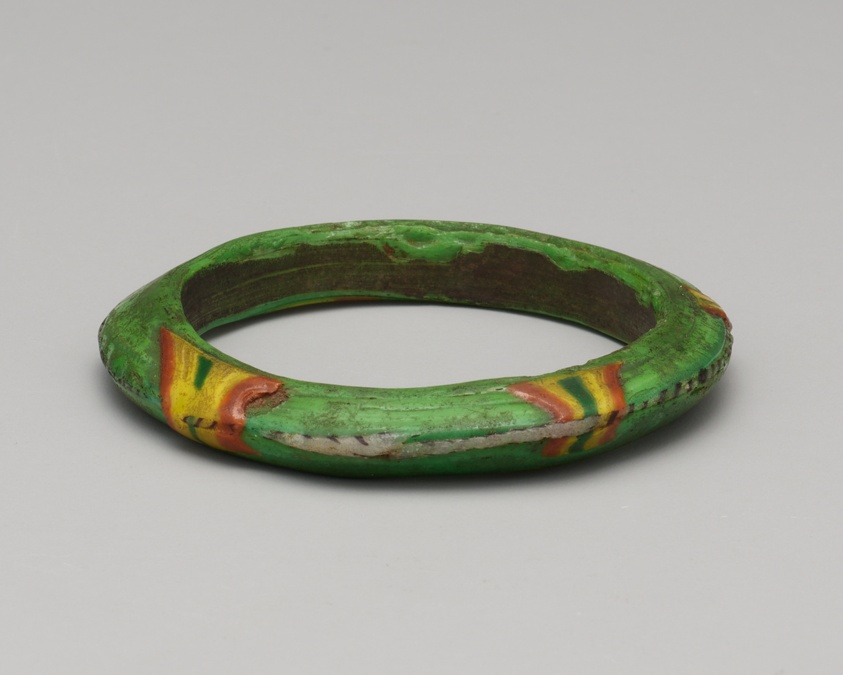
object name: Costume and Accessories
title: Bracelet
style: greco-roman (egyptian)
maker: Islamic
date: 14th-15th century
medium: Glass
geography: Egypt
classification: glass; jewelry; ancient art; costume